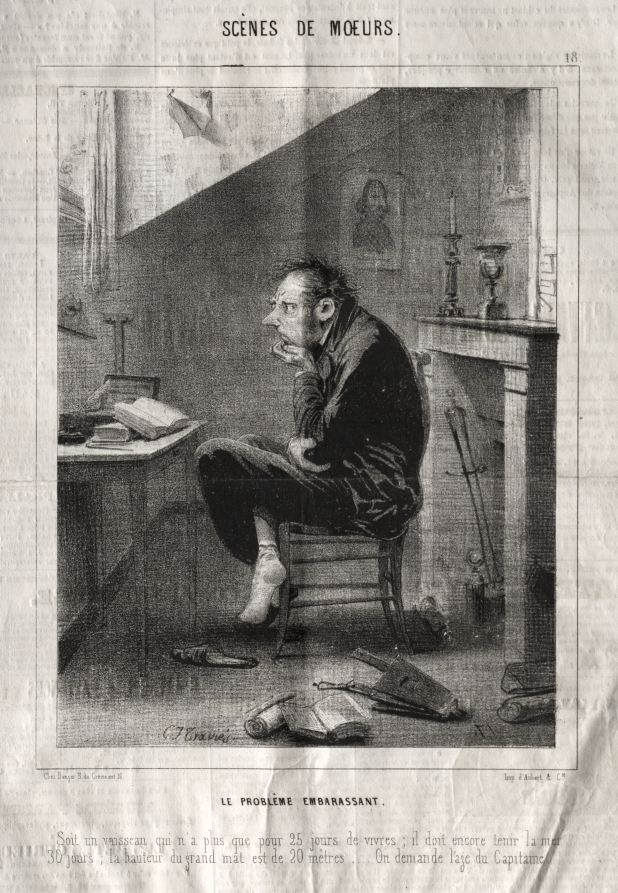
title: Scènes de Moeurs: Le Problême embarassant...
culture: France, 19th century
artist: Charles Joseph Traviès de Villers (French, 1804–1859)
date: c. 1830–45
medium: lithograph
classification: Print